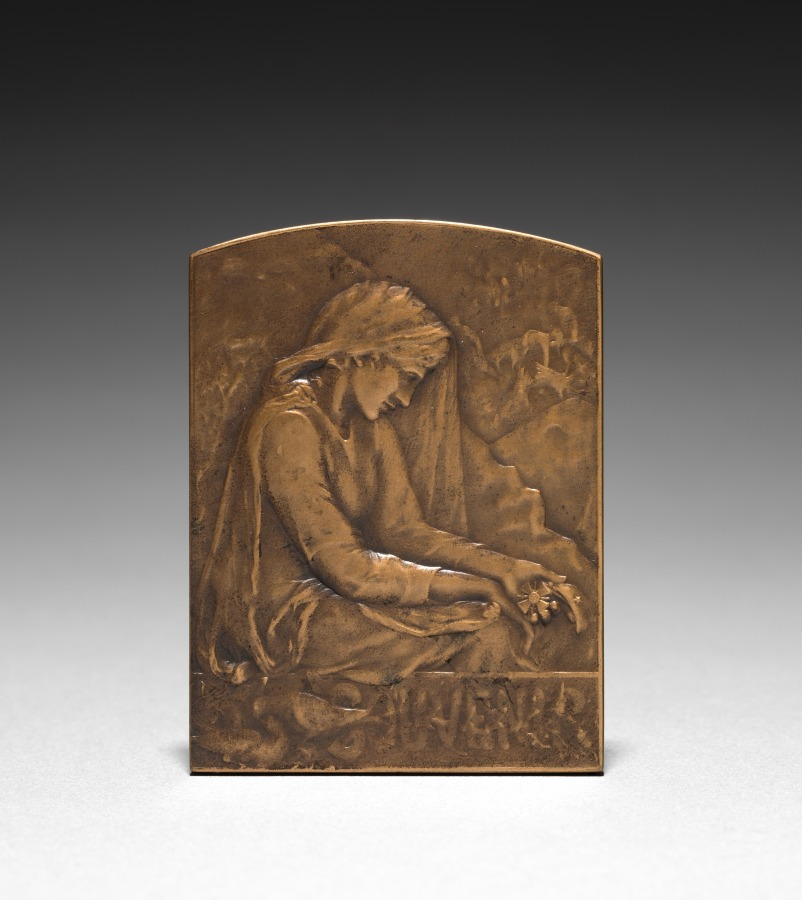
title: Medallion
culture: France, 19th century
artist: Marie Alexandre Lucien Coudray (French, 1864–1932)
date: 1900s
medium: bronze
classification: Metalwork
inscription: "SOUVENIR"; signed: "L. Coudray."